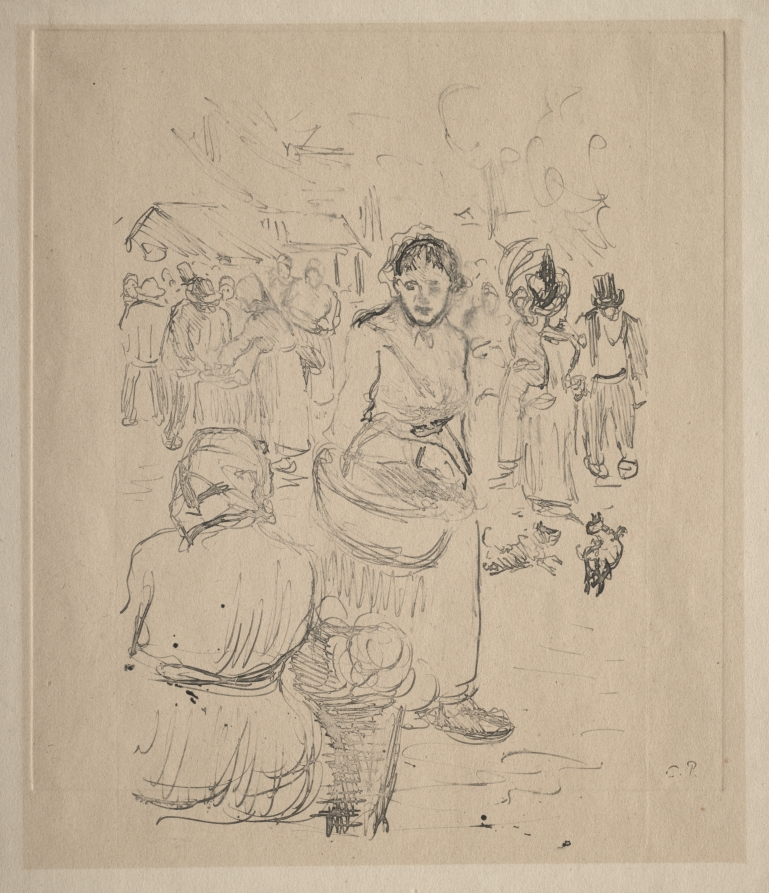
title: At the Market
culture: France, 19th century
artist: Camille Pissarro (French, 1830–1903)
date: late 1800s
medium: monotype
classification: Print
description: Pissarro probably learned the technique of monotype from his friend Edgar Degas. Although it allowed him to work in a spontaneous and expressive way, the medium never played a significant role in his work.